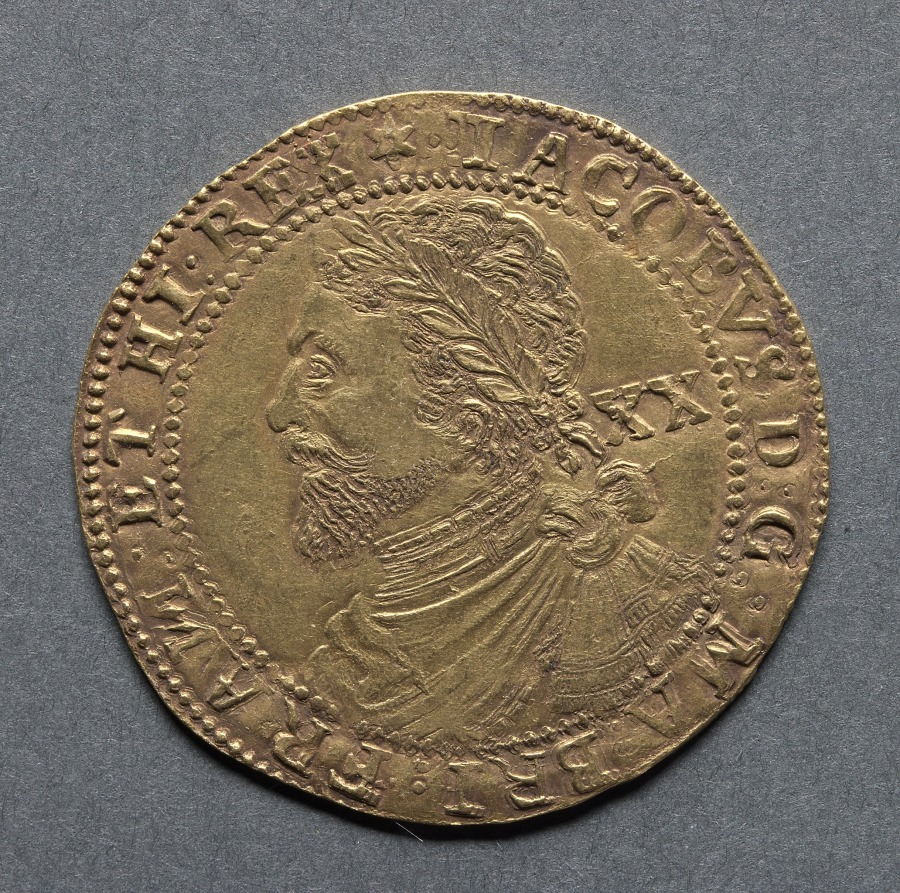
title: Laurel: James I (obverse); Shield of Arms (reverse)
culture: England, James I, 1603-1625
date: 1619–1620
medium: gold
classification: Coins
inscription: IACOBVS D:G: MAG: BRI: FRA:ET HIB: REX, XX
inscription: FACIAM EOS IN. GENTEM. UNAM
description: In 1611 the value of all gold coins, which had previously been down-rated, was now raised by ten percent. Previously the gold coins had circulated at inconvenient fractional values, such as 33 shilling; 16 shillings and 6 pence; 4 shillings and 4 pence three farthings; and so forth. To obviate this a new unit of 20 shillings value was introduced, of which this is a specimen. Showing the king wearing a laurel wreath, it quickly became known as a "Laurel."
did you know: The king is shown dressed as a Roman Emperor wearing armor.